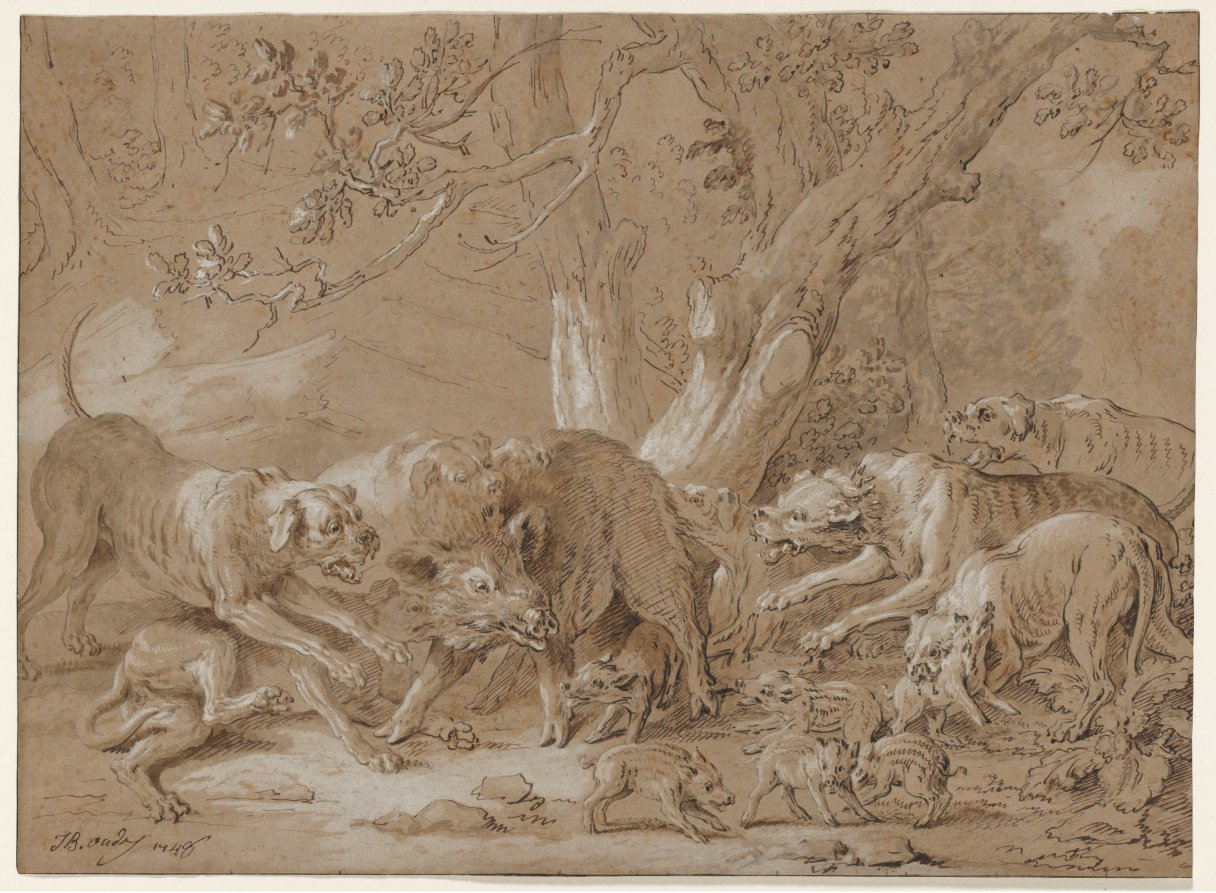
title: Wild Sow and Her Young Attacked by Dogs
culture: France, 18th century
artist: Jean-Baptiste Oudry (French, 1686–1755)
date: 1748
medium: Pen and brown and gray ink, brown and gray wash, heightened with white gouache on light brown laid paper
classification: Drawing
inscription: signd, lower left, in brown ink: JB. Oudry 1748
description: Jean-Baptiste Oudry began his career as a portraitist but gradually became known for his paintings of animals and hunting scenes. These images attracted the attention of Louis XV, and Oudry became one of France's foremost decorative painters during the king's reign. Here, the artist highlighted a violent battle between a sow and a group of dogs. The drawing relates to one of Oudry's most successful Salon paintings, which was exhibited to great acclaim in 1748. The sketchy lines and lack of detail throughout the sheet suggest that it was likely a study made in preparation for the later canvas, which was purchased by Louis XV and installed in one of his homes.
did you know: Though Oudry was a prolific draftsman, he purposely kept his drawings during his lifetime, hoping that they would be an asset for his heirs after his death.